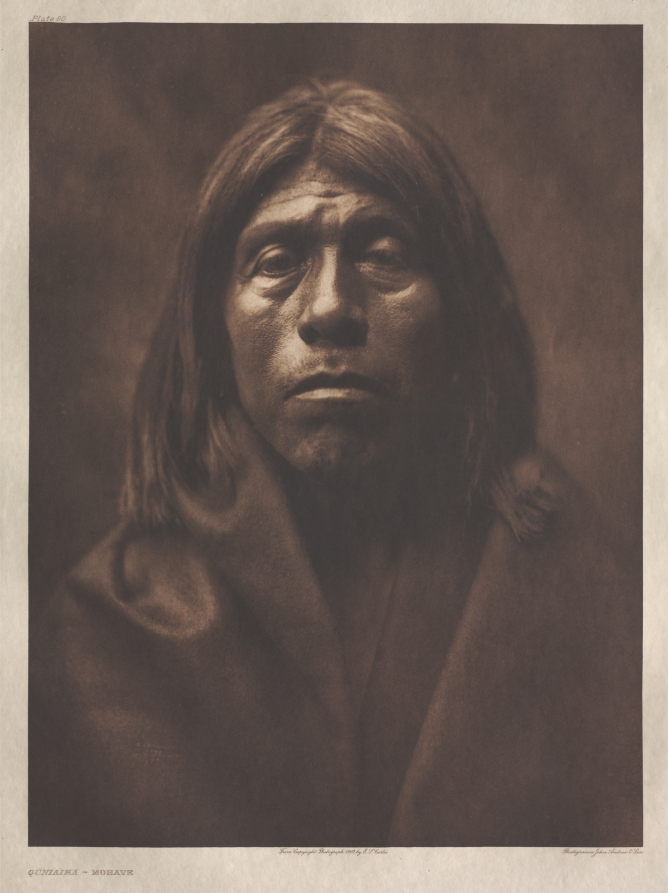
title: Portfolio II, Plate 60 / Quniáika-Mohave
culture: America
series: The North American Indian: being a series of Portfolios picturing and describing the Indians of the United States, the Dominion of Canada, and Alaska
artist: Edward S. Curtis (American, 1868–1952)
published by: The University Press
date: 1903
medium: photogravure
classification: Portfolio